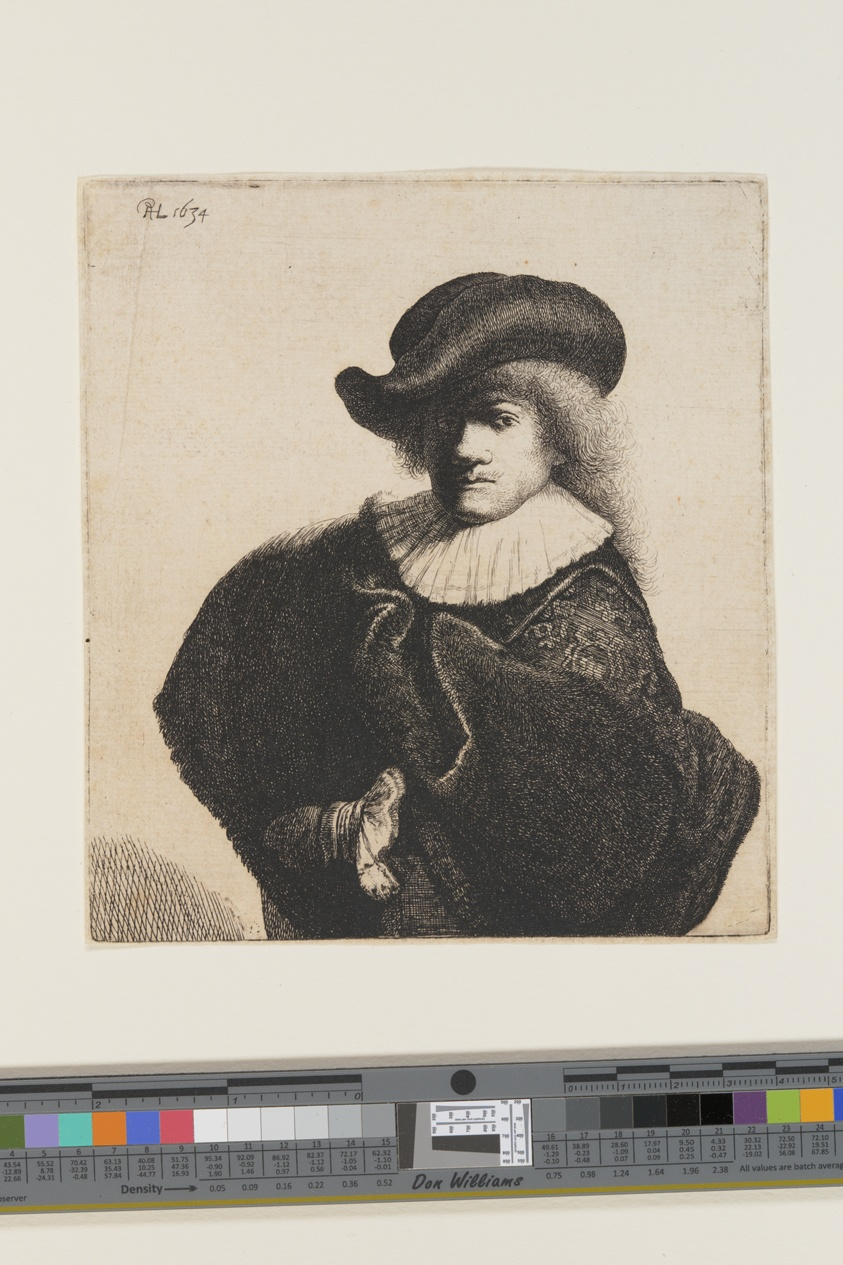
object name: Print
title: Portrait of Rembrandt Wearing a Soft Hat and Embroidered Coat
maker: Jan van Vliet (Dutch, c. 1610–1635); after Rembrandt van Rijn (Dutch, 1606-1669)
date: 1634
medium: Etching on ivory laid paper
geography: Netherlands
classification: print; paper; prints and drawing; etching